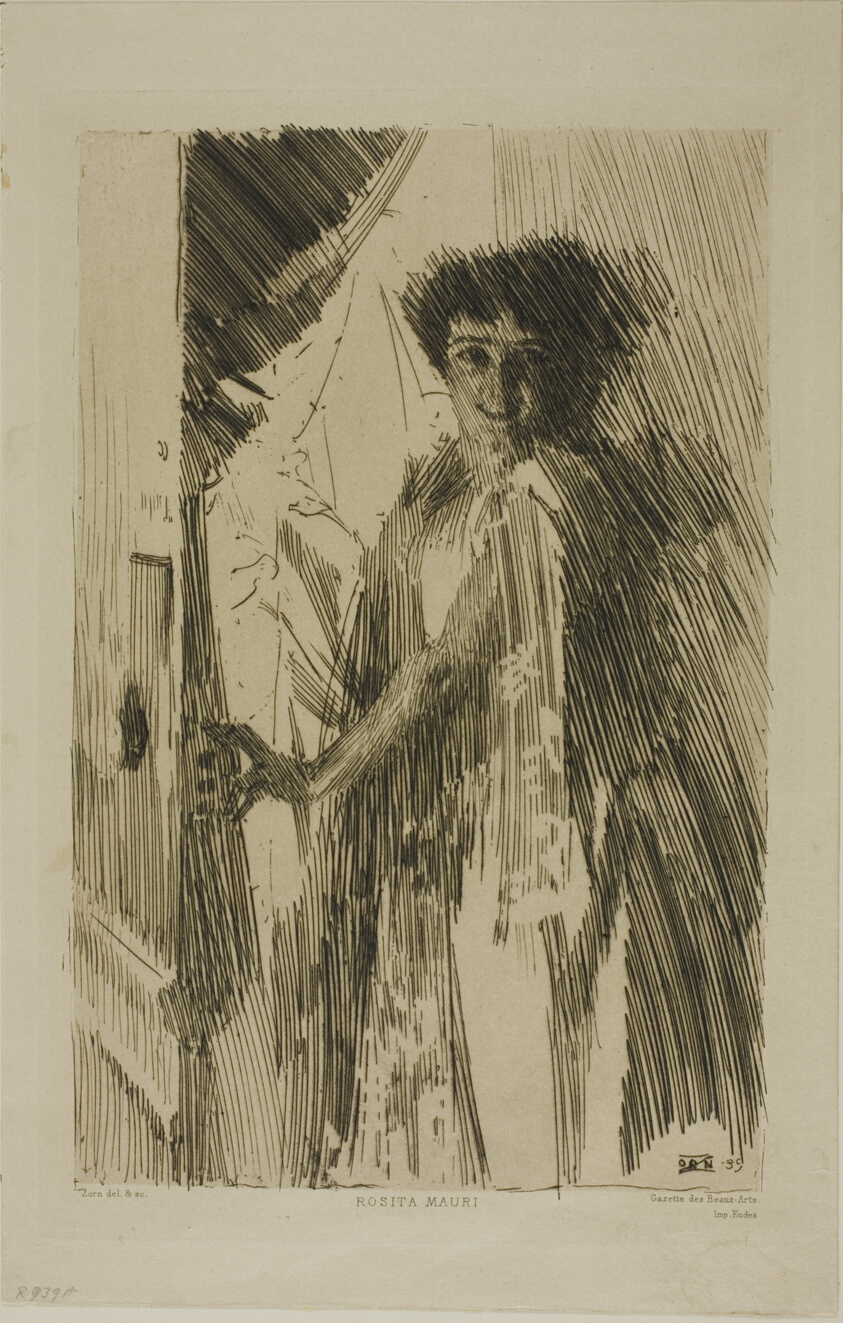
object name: Print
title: Rosita Mauri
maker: Anders Zorn (Swedish, 1860-1920)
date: 1889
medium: Etching on ivory wove paper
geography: Sweden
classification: etching; print; prints and drawing